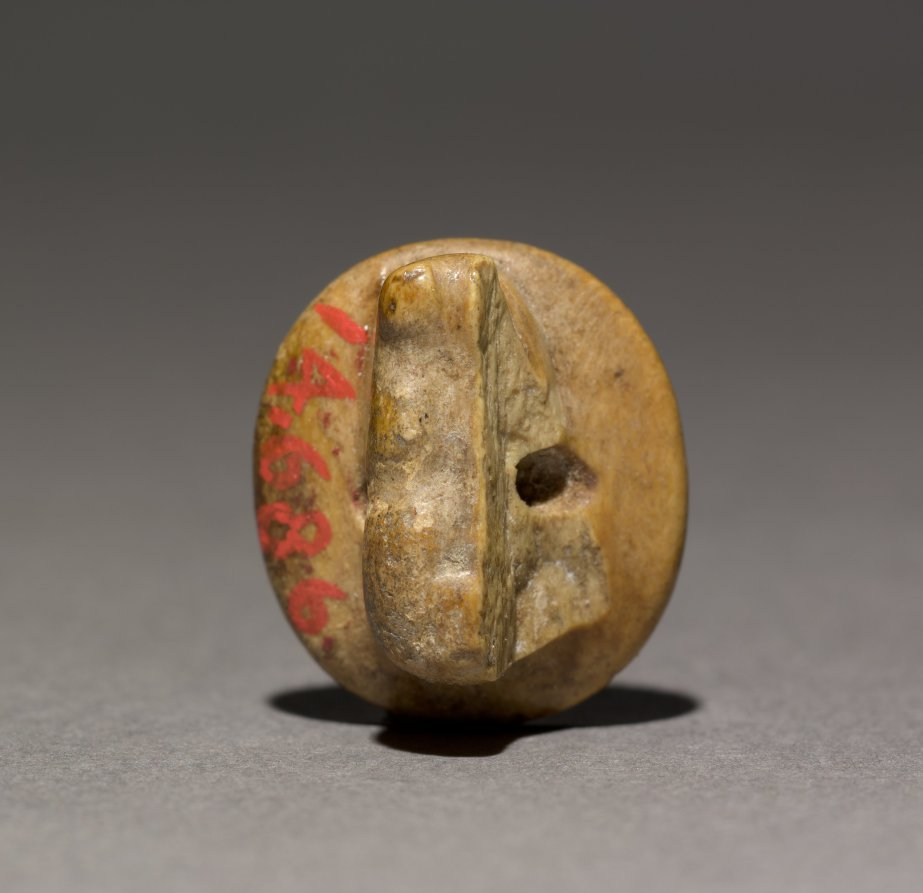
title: Seal Amulet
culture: Egypt, First Intermediate period (2123–2040 BCE)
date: 2123–2040 BCE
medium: bone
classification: Amulets